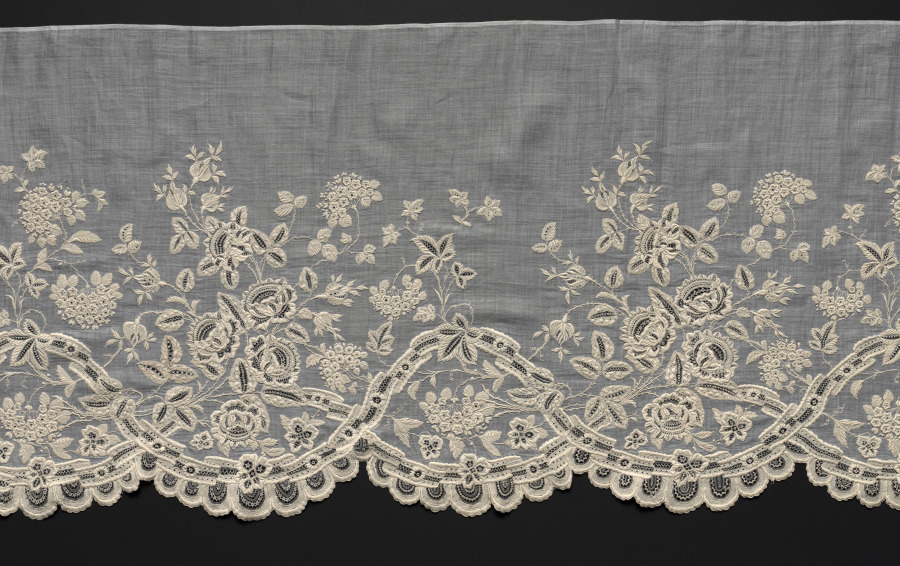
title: Flounce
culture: France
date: 1800–1820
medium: Plain weave cotton: embroidered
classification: Embroidery